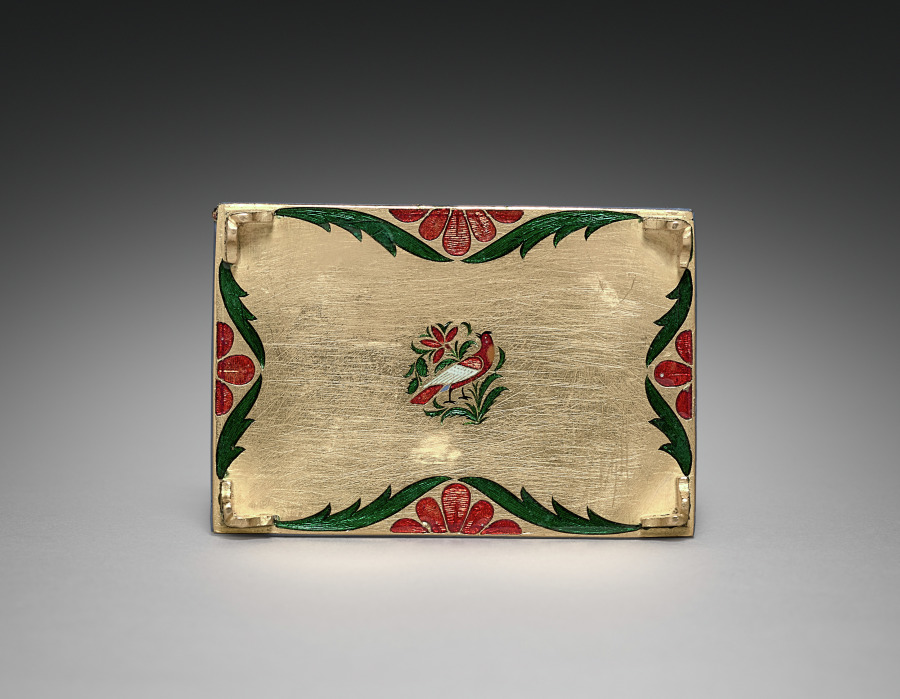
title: Box Decorated with Shiva, Vishnu, Krishna, and Ganesha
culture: Northwestern India, Rajasthan, Rajput Kingdom of Jaipur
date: c. 1800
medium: gold with enamel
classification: Metalwork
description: This box is covered in a variety of birds, animals, and plants. The central motifs on the lids include images of four Hindu gods: Shiva, Krishna, Vishnu, and Ganesha. The blue figures are Vishnu and Krishna, the latter of which is an incarnation of the former who is shown playing a flute. The elephant-headed Ganesha is red and accompanied by his mount, the bandicoot rat Dinka. The four-armed Shiva is paired with two animals, including a tiger and his sacred bull mount Nandi. Small enamel boxes could be used to house many different substances, from cosmetics to spices to stimulants, including opium and paan, a digestive typically given at formal gatherings as a sign of the host’s hospitality.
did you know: The sides have pairs of birds, while a single bird adorns the underside.